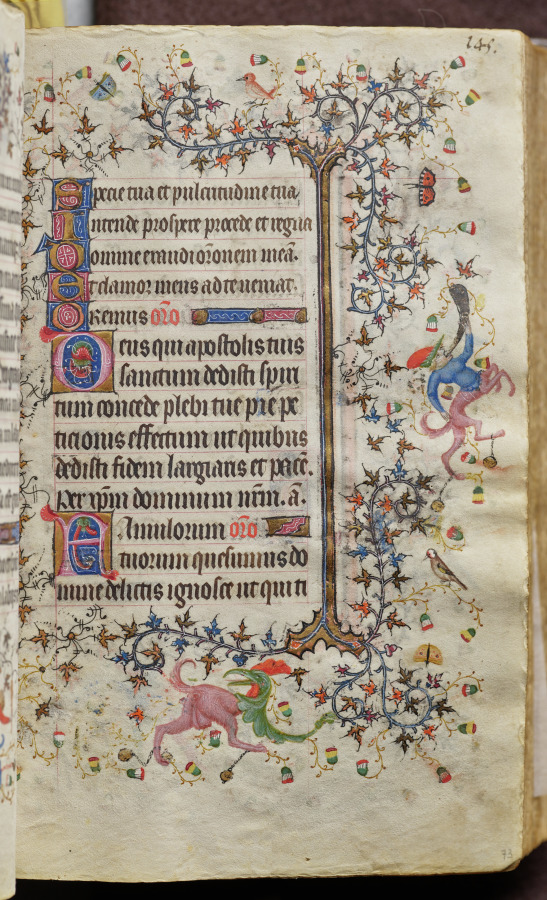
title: Hours of Charles the Noble, King of Navarre (1361-1425): fol. 73r, Text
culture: France, Paris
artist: Master of the Brussels Initials and Associates (French)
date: c. 1405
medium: ink, tempera, and gold on vellum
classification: Bound Volume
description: This precious volume was obviously highly prized by its owner, the French-born King of Navarre, who had his coat of arms painted on no less than twenty folios. Rather than directly commissioning this manuscript from a specific workshop, it seems that Charles the Noble acquired his book of hours -- perhaps ready-made for the luxury market -- while on a trip to Paris in 1404-05. A collaborative effort, six painting styles are evidenced within the pages of this codex, those of two Italians, two Frenchmen, and two Netherlanders. The painter who was responsible for the planning and decoration of the book, and who produced seventeen of the large miniatures, was a Bolognese artist known as the Master of the Brussels Initials. His principal assistant, responsible for most of the borders, was a Florentine who signed his name "Zecho" da Firenze on folio 208 verso.